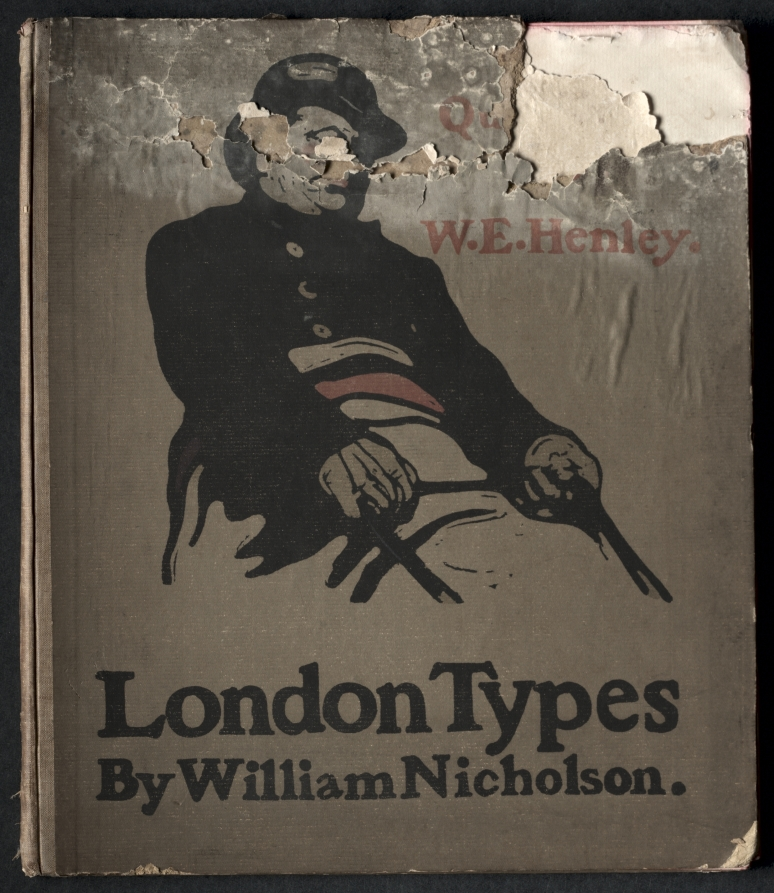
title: "London Types:" Cover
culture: England, 19th century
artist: William Nicholson (British, 1872–1949)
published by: William Heinemann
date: published 1898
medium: lithograph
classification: Bound Volume